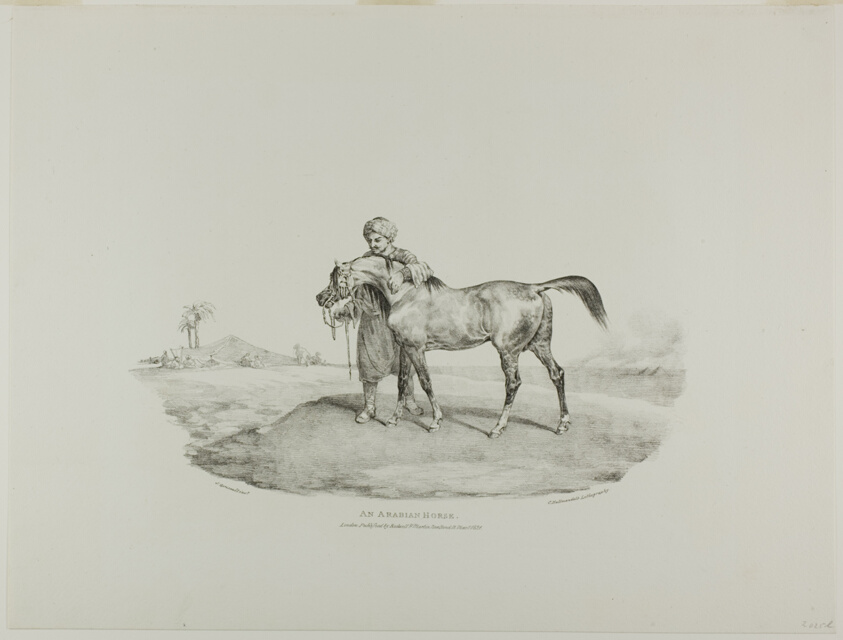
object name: Print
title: An Arabian Horse, plate 8 from Various Subjects Drawn from Life and on Stone (The English Suite)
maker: Jean Louis André Théodore Géricault (French, 1791-1824); printed by Charles Joseph Hullmandel (German and English, 1789-1850); published by Rodwell and Martin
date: March 1821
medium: Lithograph in black on ivory wove paper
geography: France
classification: lithograph; print; prints and drawing